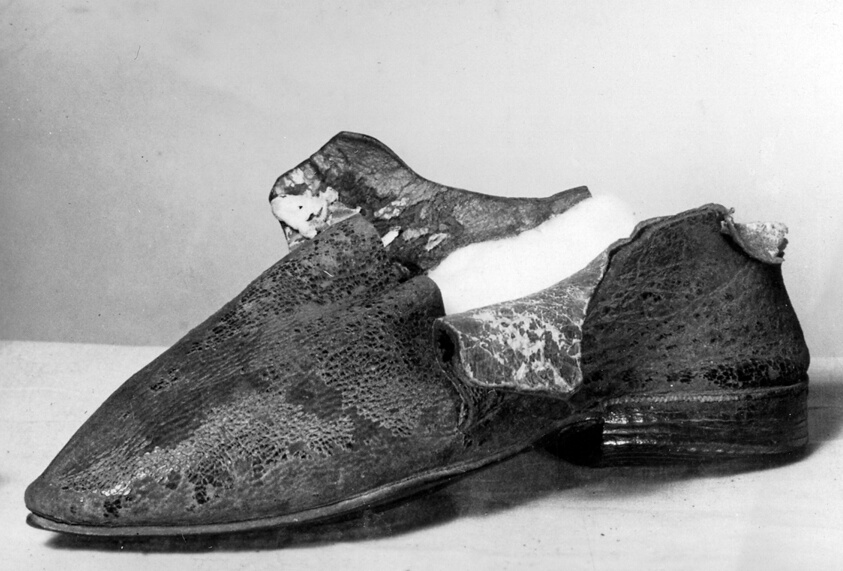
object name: Textile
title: Shoe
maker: England or France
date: 17th century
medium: Black leather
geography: England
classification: textile; shoes - misc; costume accessory - shoe; costume; dress (garment); clothing